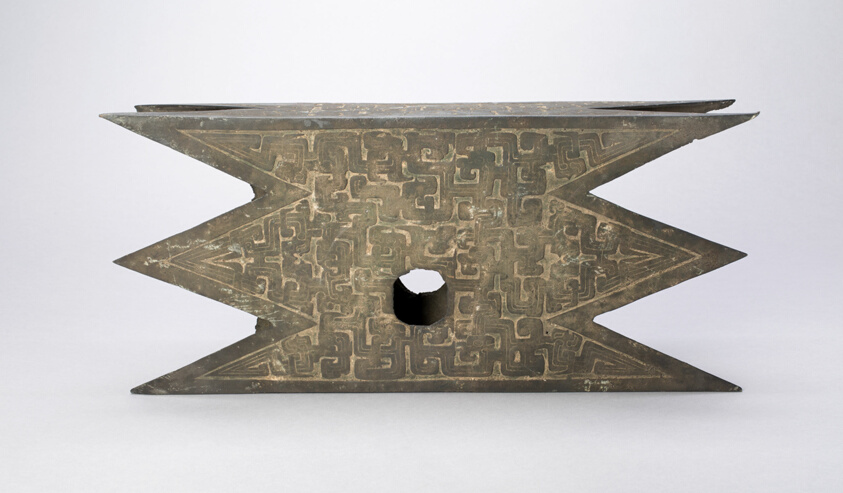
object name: Architectural fragment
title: Architectural Fitting (Gong)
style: Chinese (culture or style)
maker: China; Qishan county, Shaanxi province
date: Western Zhou dynasty, c.1050–770 B.C.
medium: Bronze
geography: China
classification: bronze; metal; fitting; asian art; architectural fragment